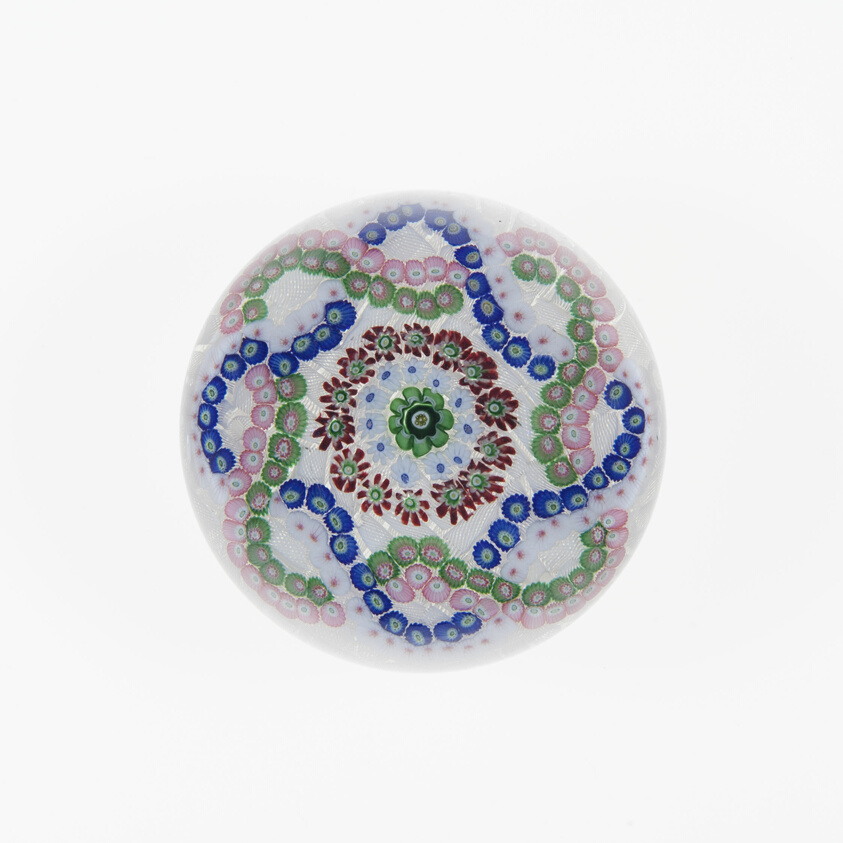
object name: Glass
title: Paperweight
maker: Clichy Glassworks (Cristalleries de Clichy); Clichy, France, 1837-1885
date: c. 1845/60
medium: Glass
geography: France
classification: paperweight; glass